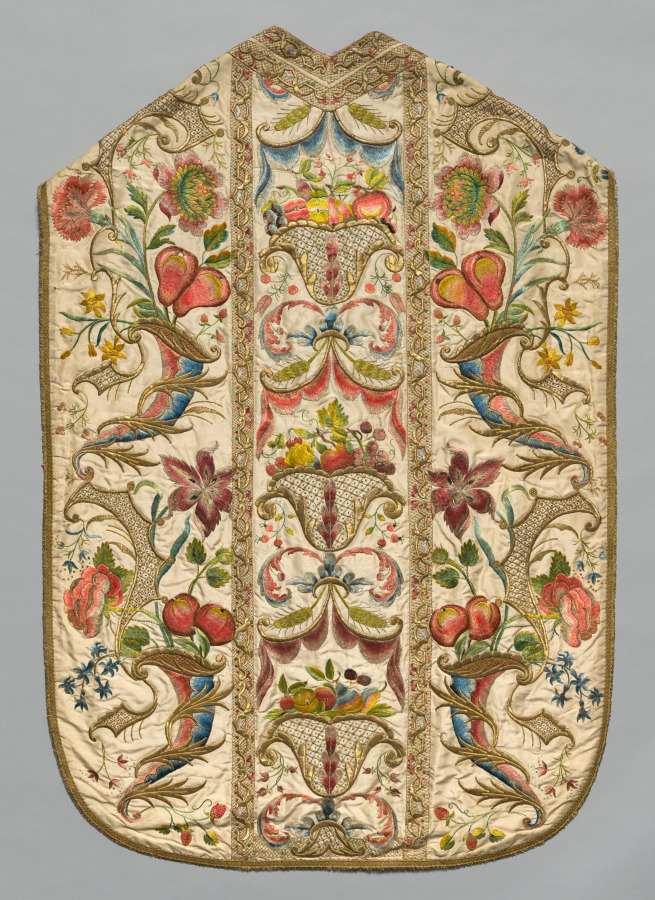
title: Chasuble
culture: Italy or Spain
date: 1700s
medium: Silk and metallic threads: embroidery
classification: Embroidery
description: The chasuble’s exquisite symmetrical decoration highlights its central panel where three illusionary gold containers hold skillfully shaded fruit in pastel silk tones. Delicately curving motifs enhance the side panels along with finely stitched strawberries in so-called French knots. This liturgical chasuble and other vestments, worn over a white alb with lace, were embroidered by professional specialists, such as experts who shaded colored silks or secured gold thread, in early versions of assembly lines that were usually in secular workrooms or in convents. The church or commissioner supplied the raw materials and paid a fee for the work.